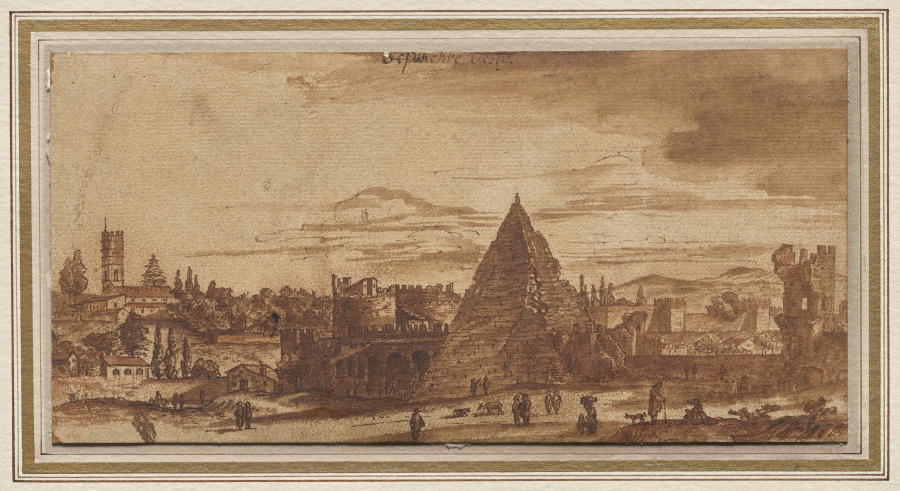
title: The Pyramid of Cestius, Rome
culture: Netherlands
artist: Michiel van Overbeek (Dutch, active 1663–1709)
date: c. 1650–80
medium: Pen and brown ink with red chalk on brown prepared paper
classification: Drawing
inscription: Inscribed u.m. Sepulchre Cesty, initialled l.r. M.V.O. del[?]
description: The Dutch artist Michiel Van Overbeek drew The Pyramid of Cestius, Rome from southwest of the site, looking toward the 12 BC Pyramid of Cestius, and the 3rd- to 4th-century Porta Ostiensis (Porta Santo Paulo). The Egyptian structure in the Roman countryside attracted many tourists, and artists, for its singularity within the Roman architectural landscape. The careful attention given to the rise of the land at left, with small abodes tucked into the hills, and the crumbling ruin at the right, suggest that Van Overbeek wanted to record the scene as accurately as possible.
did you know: The Pyramid of Cestius was constructed in Rome as a tomb in 12 BC during a fad for Egyptian things just a few years after Rome had conquered Cleopatra’s Egypt (30 BC).